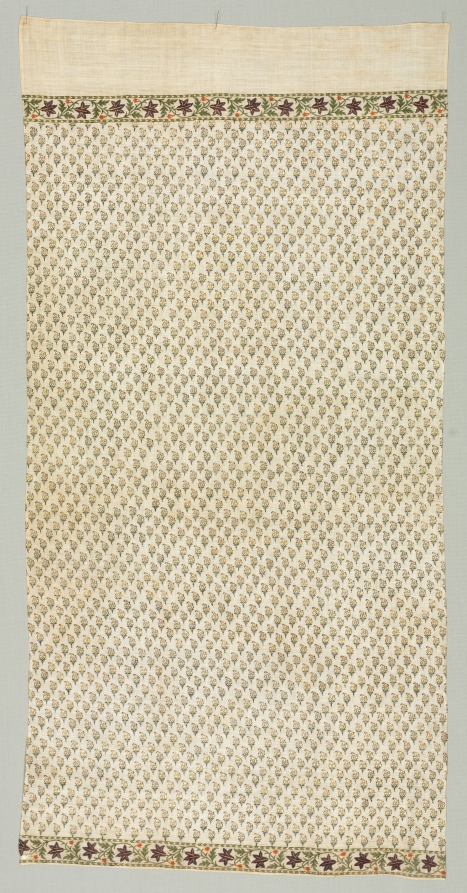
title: Fragment of a Turban Cloth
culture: India, Rajasthan, Mughal period, early 19th Century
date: 1800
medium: cotton muslin (loom width), undyed, block printed, and overprinted with gold leaf (varak)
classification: Textile